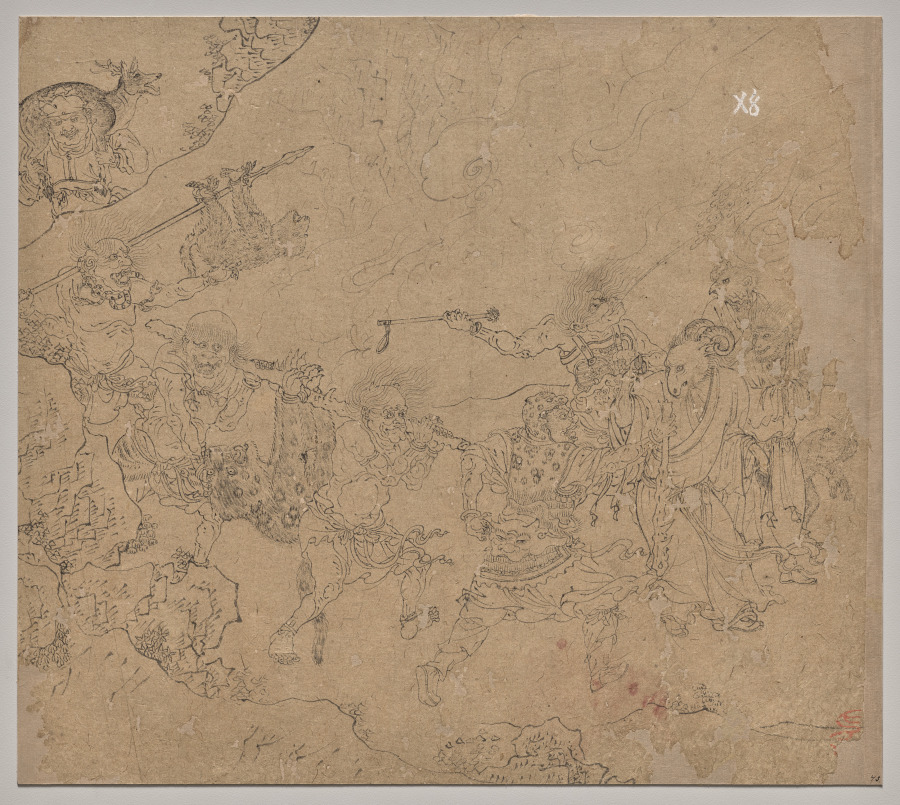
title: Album of Daoist and Buddhist Themes: Search the Mountain: Leaf 45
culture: China, Southern Song dynasty (1127-1279)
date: 1200s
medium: Album, ink on paper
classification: Painting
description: This extraordinary album has 50 paintings on a variety of religious subjects. They were likely created by several master craftsmen to share with studio apprentices as models for fulfilling commissions. The Jade Emperor and the Daoist pantheon make up the first 26 leaves. The next 14 leaves portray the Buddhist Ten Kings of Hell administering punishments to the dead. The third section, called “Clearing the Mountains,” features divine soldiers, led presumably by the deity Erlang Shen 二郎神, fighting undesirable creatures.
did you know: On the left, demon-soldiers carry their prey. On the right, half-animal figures, one with a ram’s head, are ushered forward and driven out of the mountain.